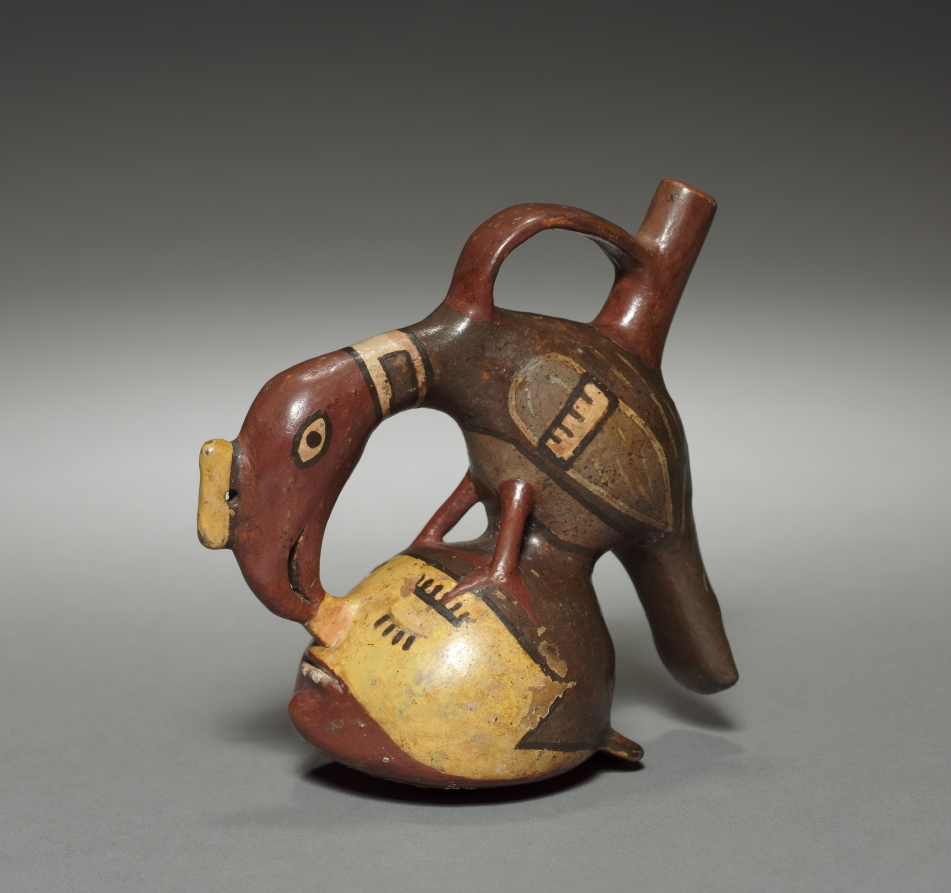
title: Vessel with Condor and Human Head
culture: Peru, Tiwanaku style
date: 400–1000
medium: pottery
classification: Ceramic